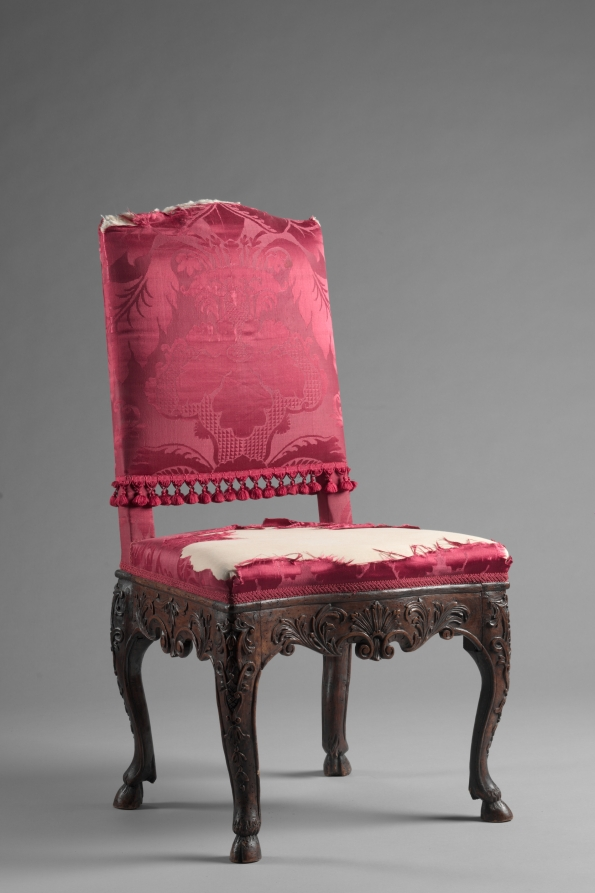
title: Side Chair (1 of 2)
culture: Germany, Belgium, or the Netherlands, early 18th century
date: early 1700s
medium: walnut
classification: Furniture and woodwork